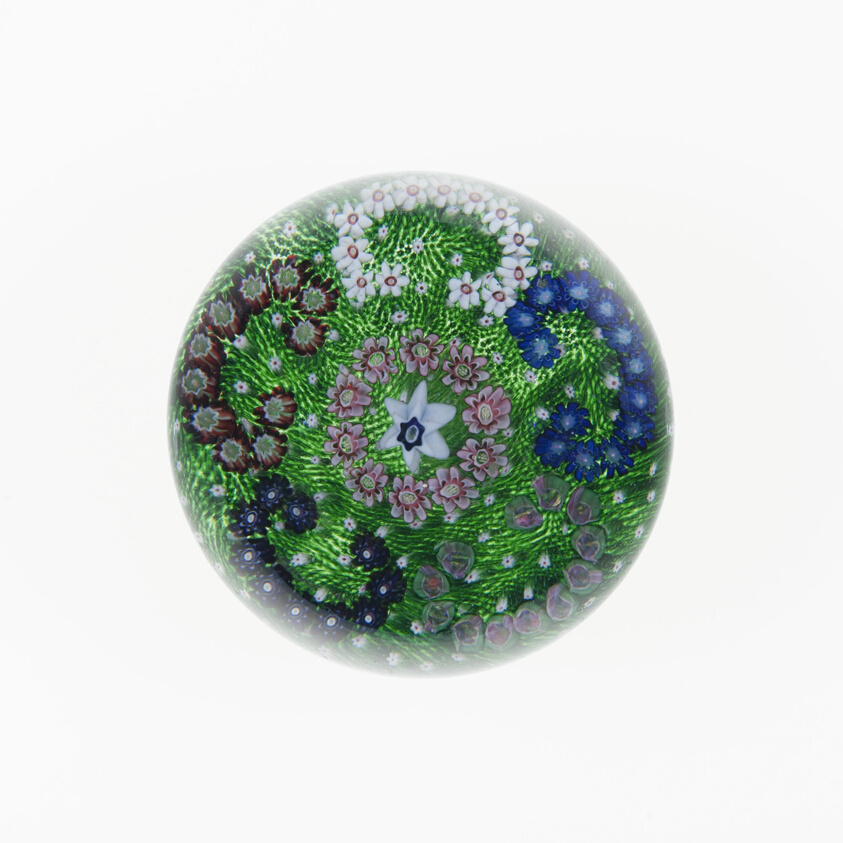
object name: Glass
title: Paperweight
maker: Clichy Glassworks (Cristalleries de Clichy); Clichy, France, 1837-1885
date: c. 1845/60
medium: Glass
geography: France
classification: paperweight; glass